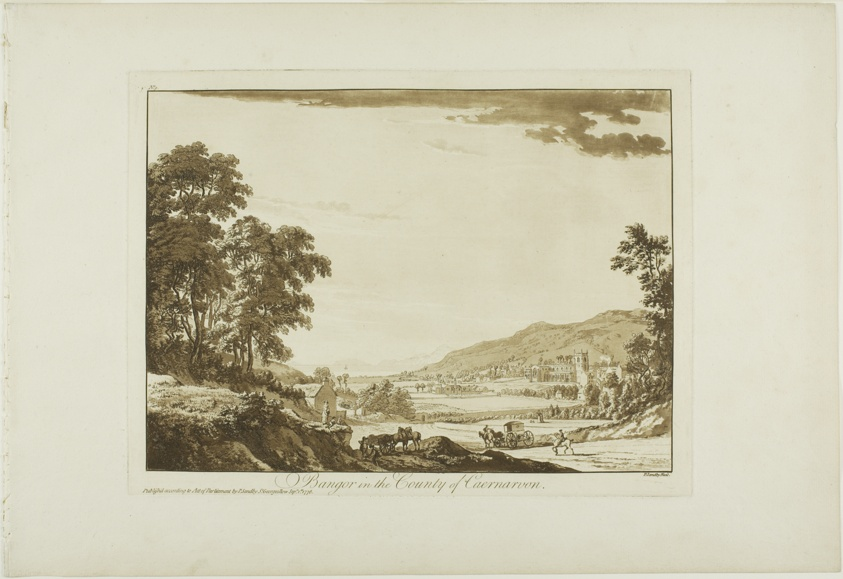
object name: Print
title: Bangor in the County of Caernarvon, plate nine from Twelve Views in North Wales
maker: Paul Sandby (English, 1731-1809)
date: 1776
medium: Aquatint with etching on ivory laid paper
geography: England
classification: etching; print; prints and drawing